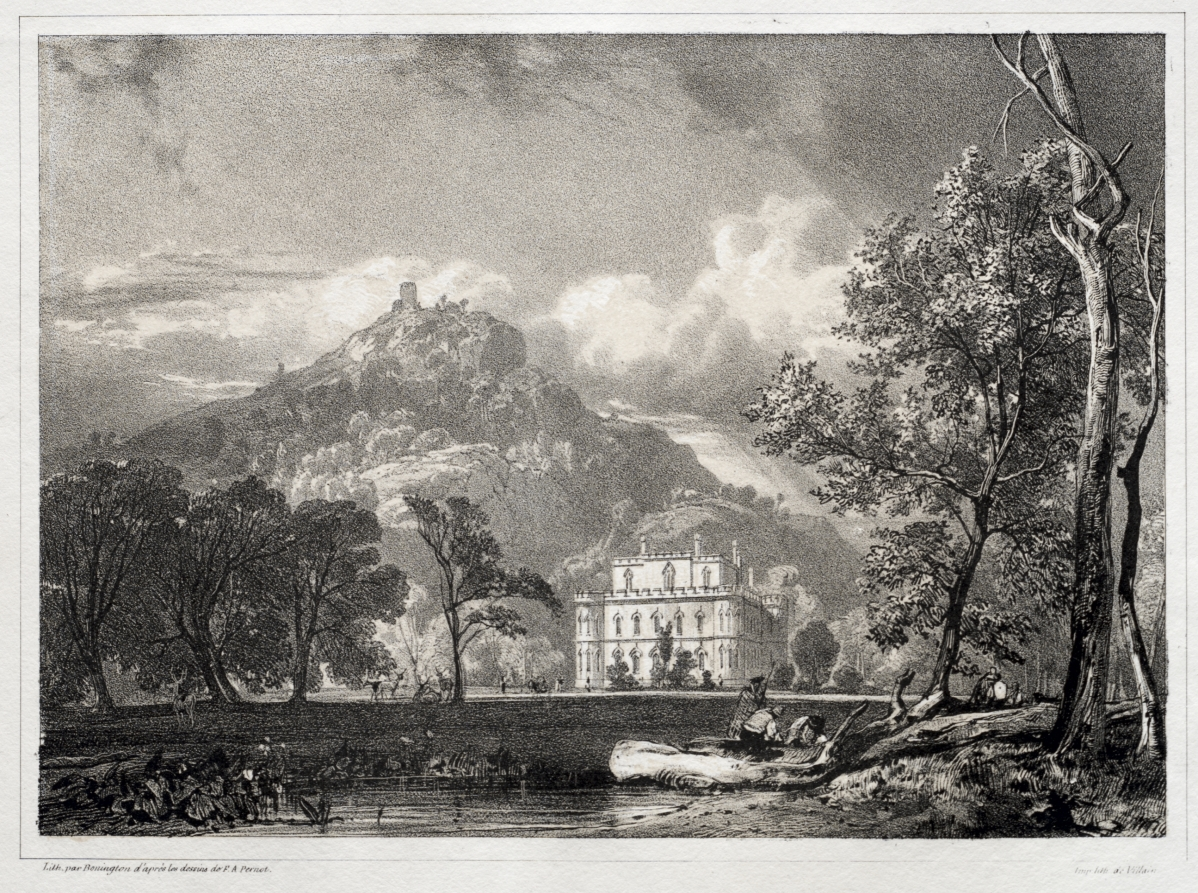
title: Argyle Castle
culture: England, 19th century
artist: Richard Parkes Bonington (British, 1802–1828)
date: 1826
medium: lithograph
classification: Print